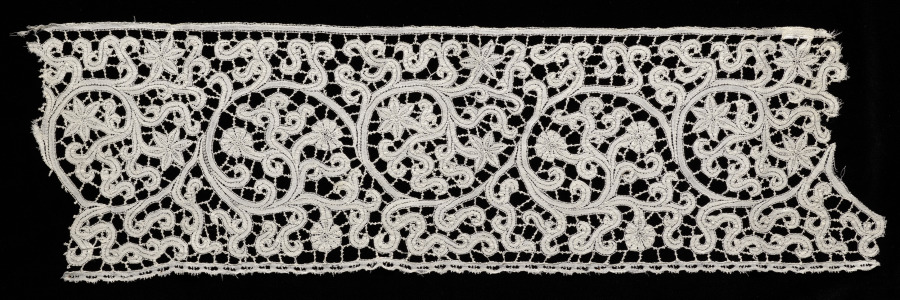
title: Lace Border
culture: Italy, Milan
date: 1600s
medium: Bobbin lace (Punto di Milano)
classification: Lace